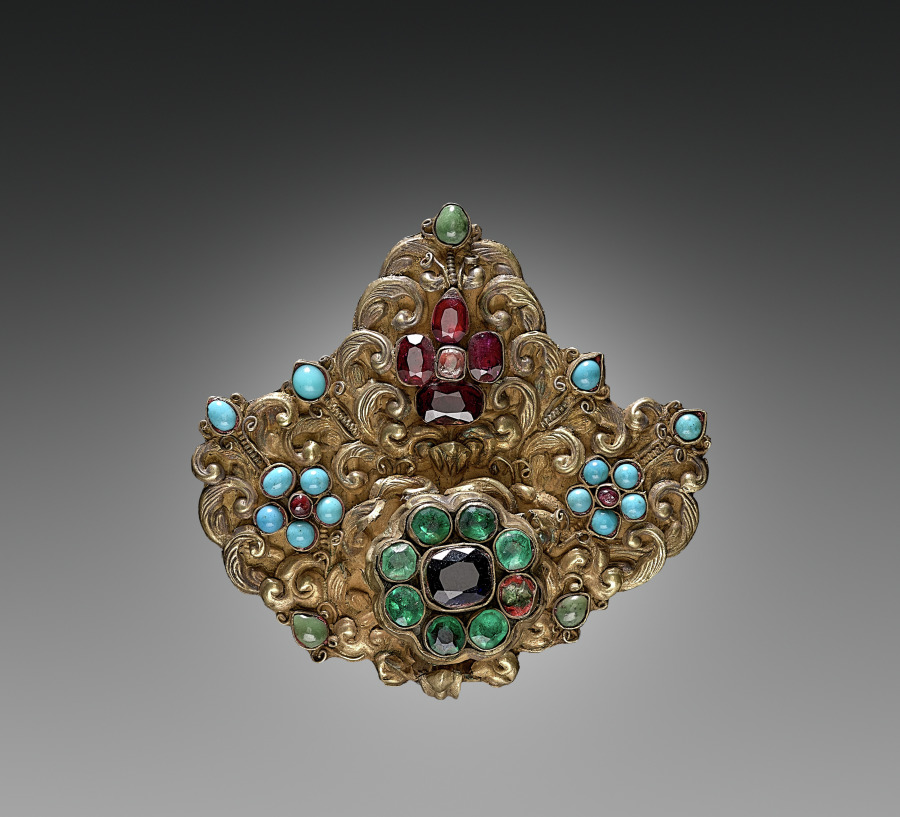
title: Pendant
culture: India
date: 1800s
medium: silver gilt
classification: Jewelry